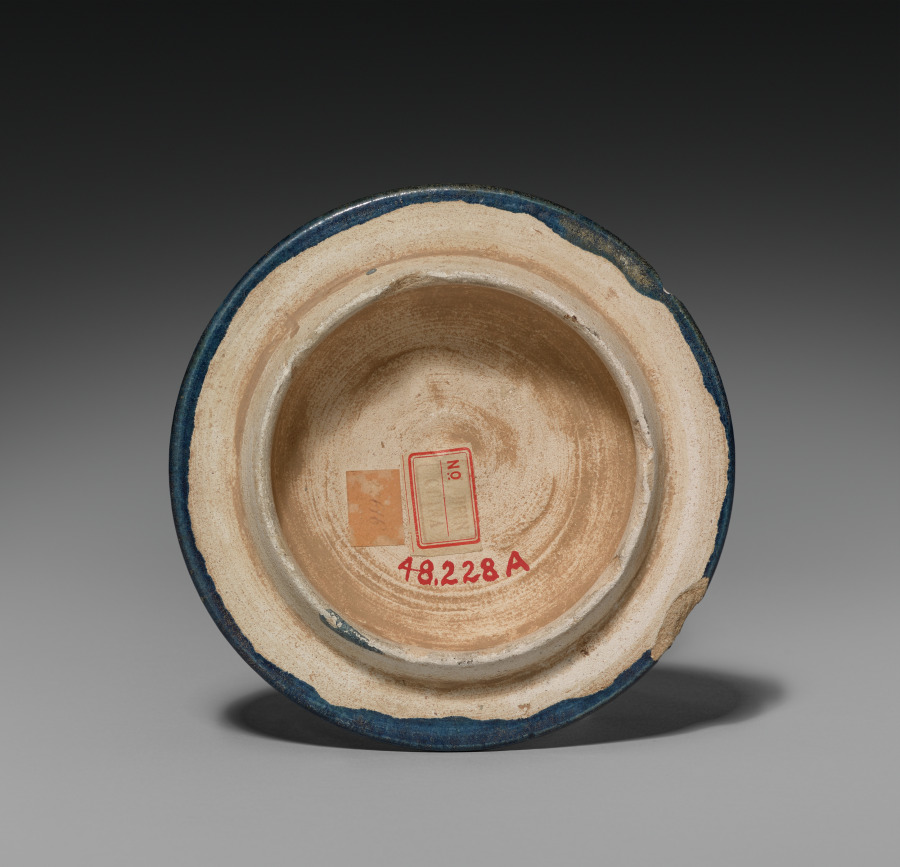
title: Covered Jar (lid)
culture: China, Tang dynasty (618-907)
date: early 700s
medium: glazed earthenware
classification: Ceramic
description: This covered cylindrical jar with three animal feet is lavishly covered with a cobalt blue glaze in the exterior and an amber glaze in the interior. Of the colored lead glazes of sancai (three-color) ware, blue was preeminent and precious. Imported cobalt from Persia (Iran, Afghanistan) was used as a glaze colorant that yields a rich, brilliant blue of considerable splendor.